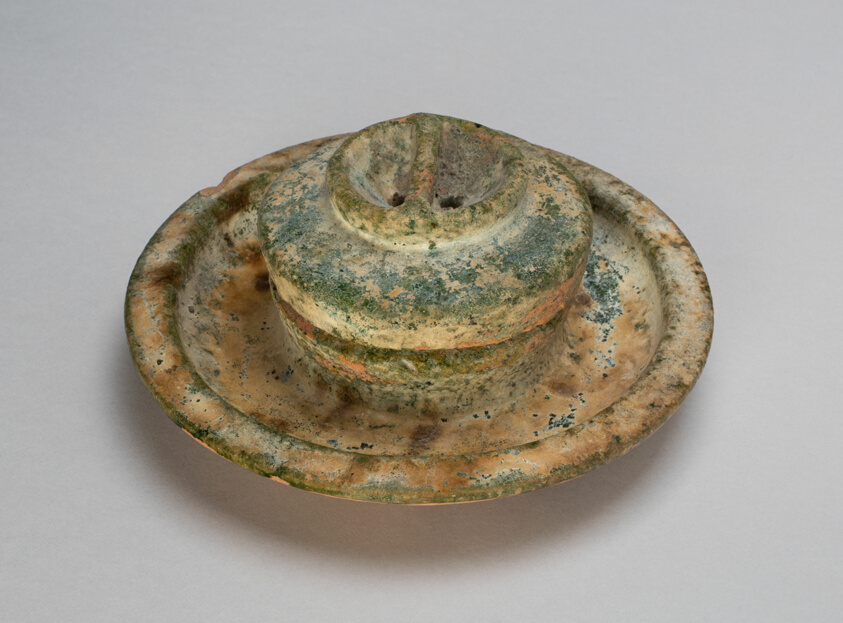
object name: Vessel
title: Mill Grinder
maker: China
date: Eastern Han dynasty (A.D. 25–220)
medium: Earthenware with green lead galze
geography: China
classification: ceramics; asian art; vessel